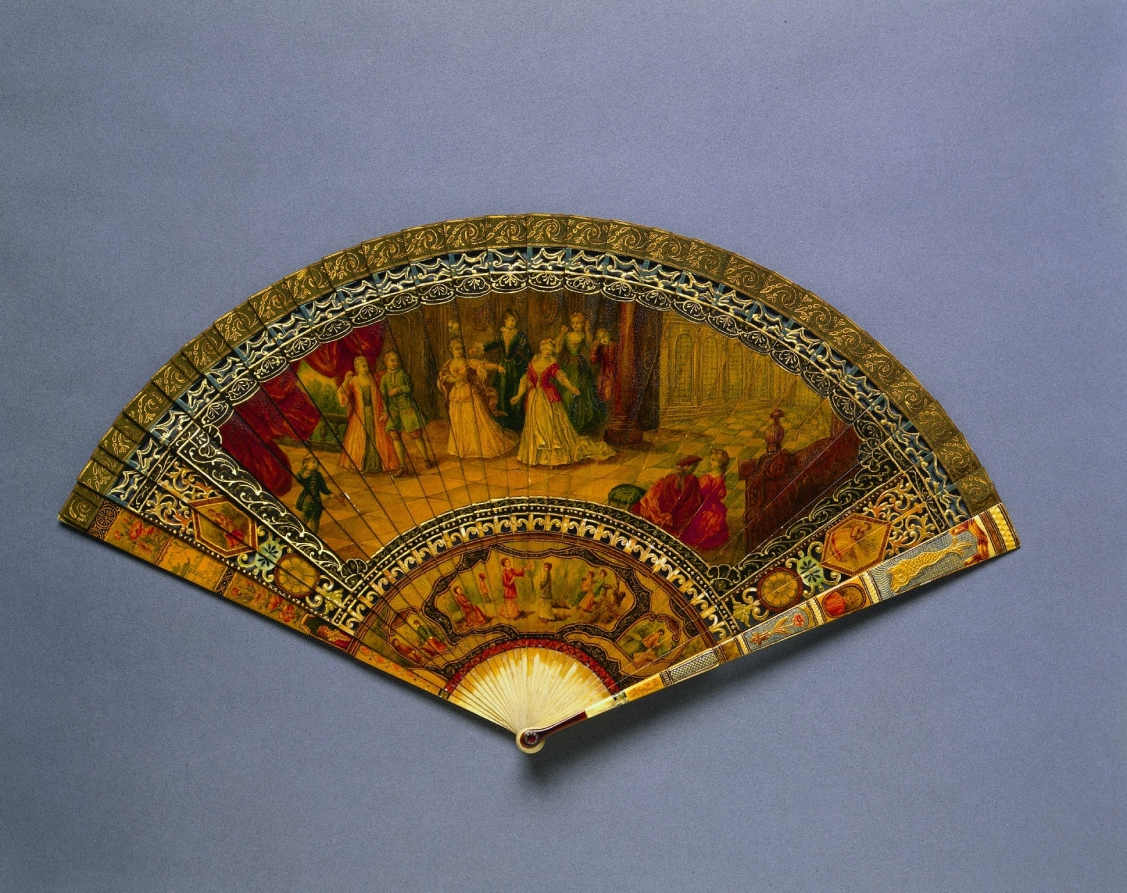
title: Fan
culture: France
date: c. 1888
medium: wooden frame painted and lacquered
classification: Miscellaneous